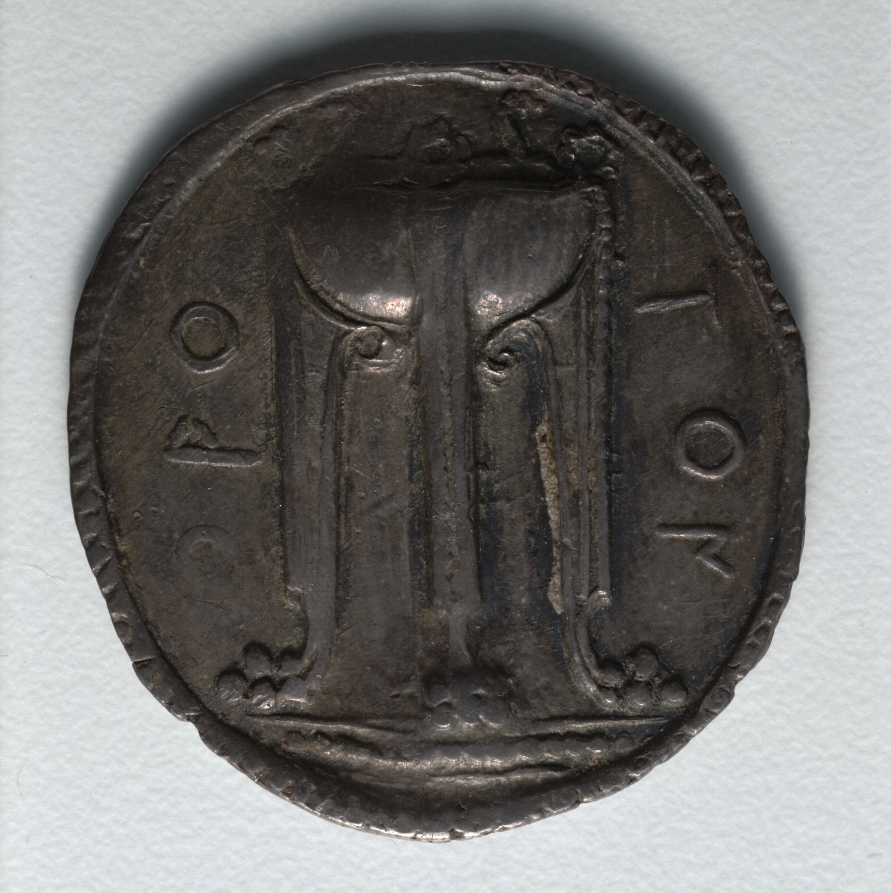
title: Stater: Tripod (obverse)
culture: Greek, minted at Kroton (South Italy)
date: c. 530–510 BCE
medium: silver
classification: Coins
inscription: ϘΡΟ | ΤΟΝ